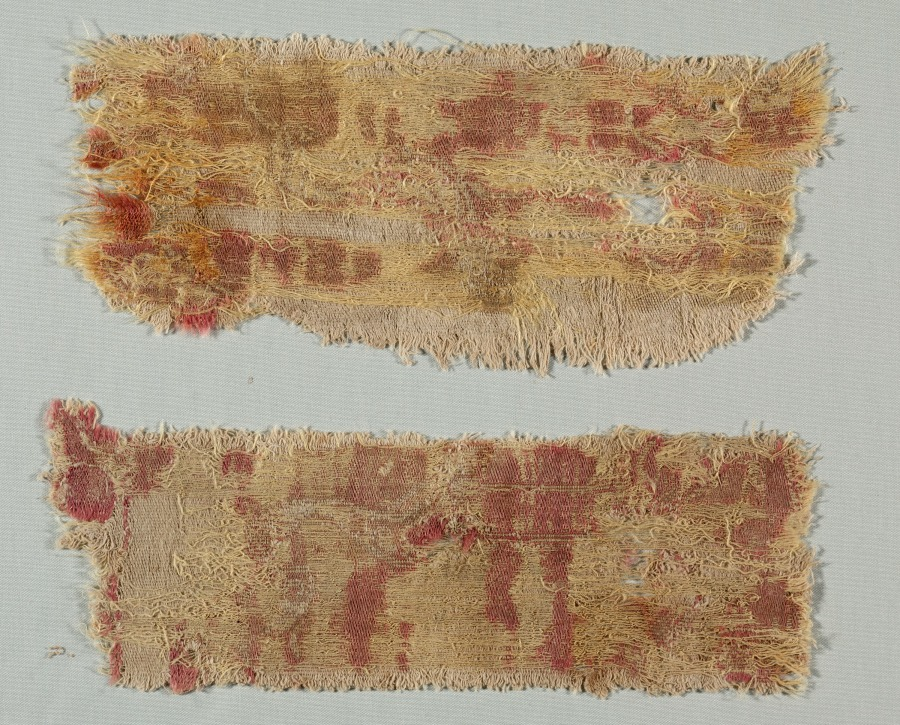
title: Two Fragments of Large Scale Roundel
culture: Iran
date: 600s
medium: compound twill; wool and cotton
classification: Textile